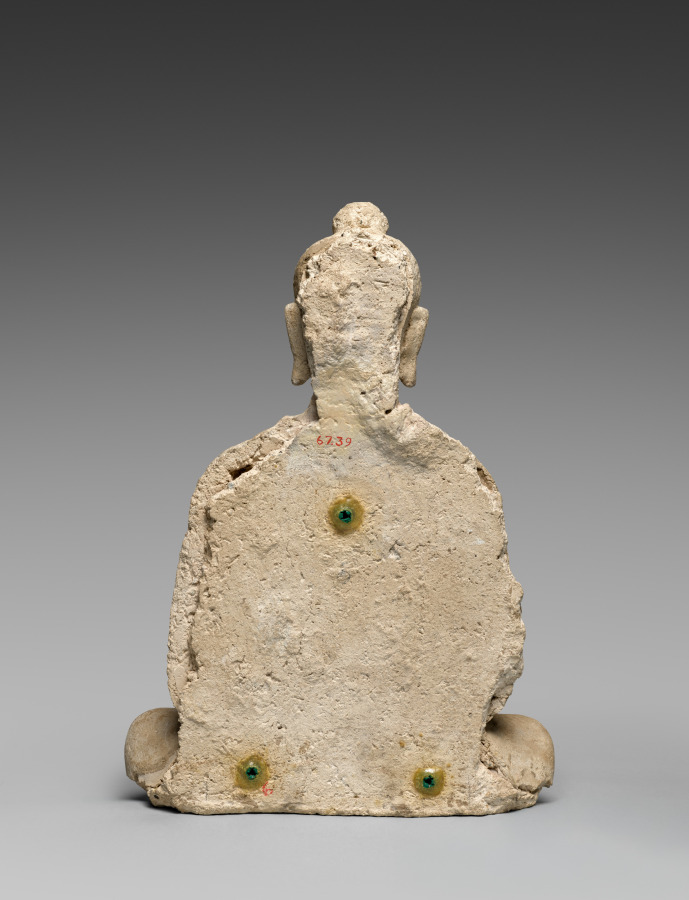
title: Seated Buddha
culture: Afghanistan, Hadda, probably Tape Shotor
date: c. 300 CE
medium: stucco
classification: Sculpture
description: Multiple images of seated Buddhas and related figures surrounded monuments called stupas that enshrined sacred relics. Made of stucco, which is a lime-based plaster material, the backs of the sculptures were fixed to the platform on which the hemispherical stupa was constructed. Visitors would see these images as they venerated the stupas by walking around them reverently, in a clockwise direction. The main stupa at Hadda reportedly contained relics of Shakyamuni Buddha, also known as Siddhartha Gautama, the founder of the Buddhism.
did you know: The way the Buddha holds his hands on his crossed legs indicates that he is shown in meditation.